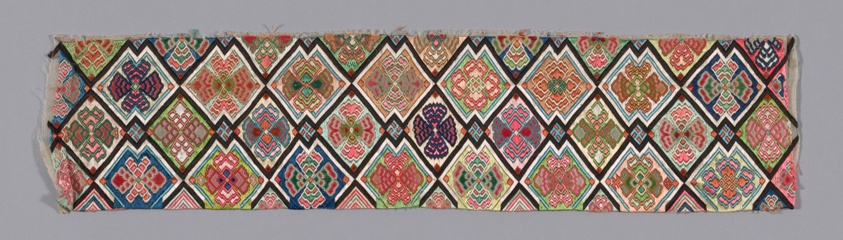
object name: Costume and Accessories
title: Band (from Woman's Trousers or Robe)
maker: China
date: 1875/1900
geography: China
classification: costume - needlework; needlework (visual works); costume